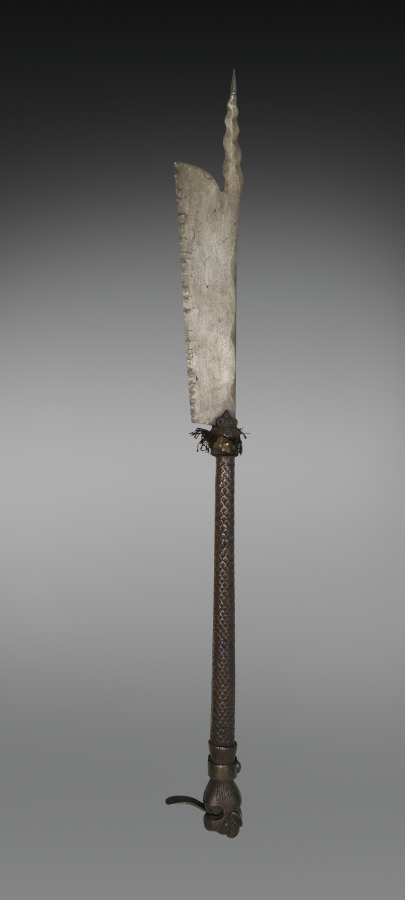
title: Glaive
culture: Italy, 15th century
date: 1400s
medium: plain steel blade, carved wooden haft with protruding tongue of steel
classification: Arms and Armor